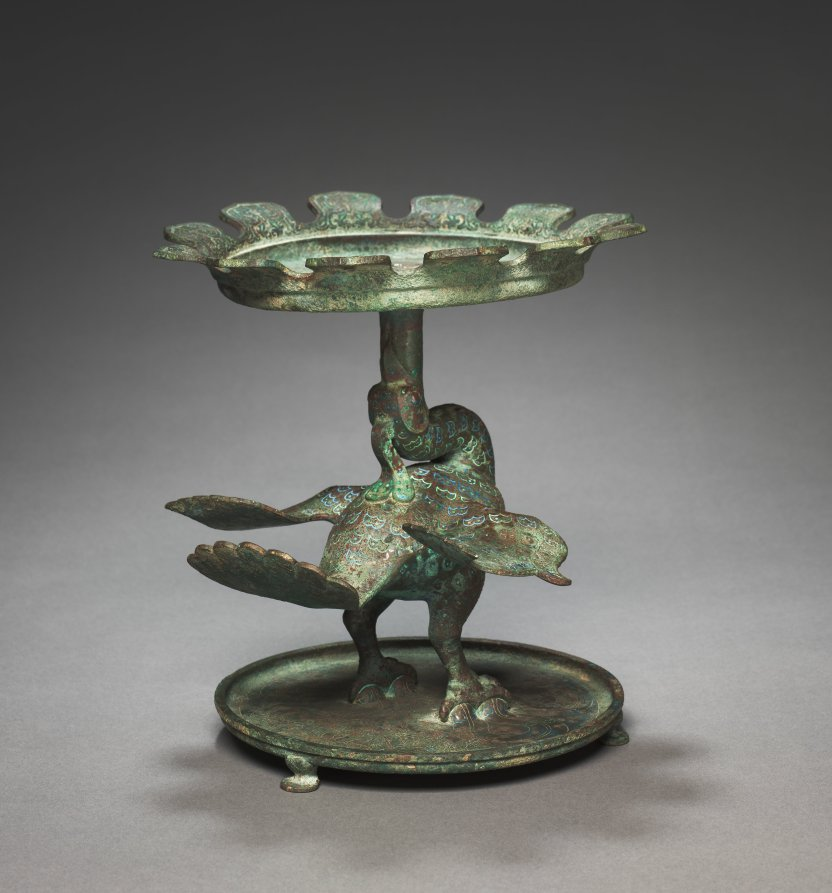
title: Shallow Basin Supported by a Bird (Bian)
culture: China, Warring States period (475–221 BCE)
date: early 400s BCE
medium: bronze inlaid with powdered malachite and azurite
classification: Metalwork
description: The bird, in its graceful and dignified pose, firmly grasps a pair of intertwined serpents cast in the lower basin. This composition of the bird's triumph over the serpent has been given various interpretations. The Chinese ethnographers regard this as a totemic symbol—a suggestion of a specific clan's superiority over contending neighboring peoples. Other scholars interpret this as good creatures warding off evil influences or as an early manifestation of the concept of complementary pairing (yin-yang, heaven-earth) in Chinese cosmology. The original appearance of this vessel was brilliant and colorful due to the use of malachite and azurite in inlaid decoration, producing red, green, and blue against the bronze surface.